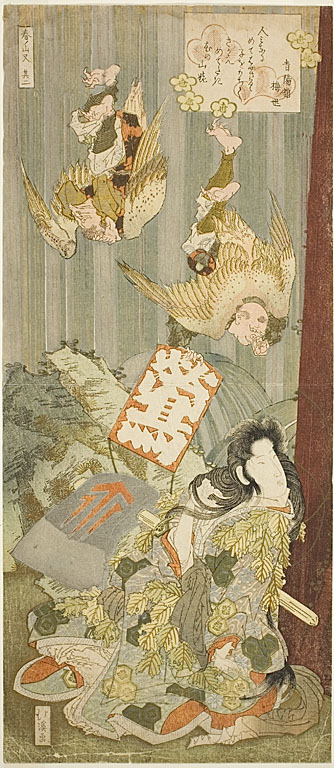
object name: Print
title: Yamauba in the Ashigawa Mountains Accompanied by Flying Nightingale (Uguisu) Men, the second piece from the diptych of "Spring Mountains (Haru no yama-mata)"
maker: Totoya Hokkei (Japanese, 1780–1850)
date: about 1830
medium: Color woodblock print; left piece of the diptych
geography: Japan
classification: print; asian art